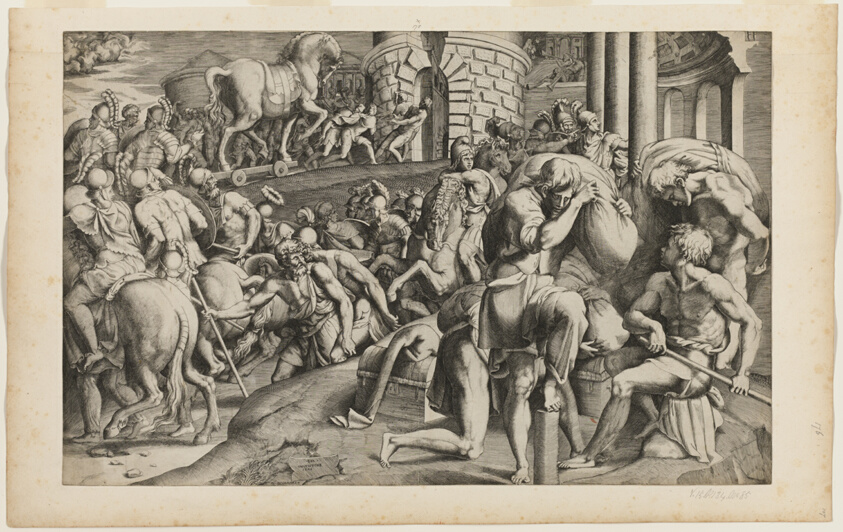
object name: Print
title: The Trojan Horse Being Dragged into the City of Troy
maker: Giulio Bonasone (Italian, c. 1510–after 1576); after Francesco Primaticcio (Italian, 1504-1570)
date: 1545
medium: Engraving on ivory laid paper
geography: Italy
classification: engraving; print; prints and drawing